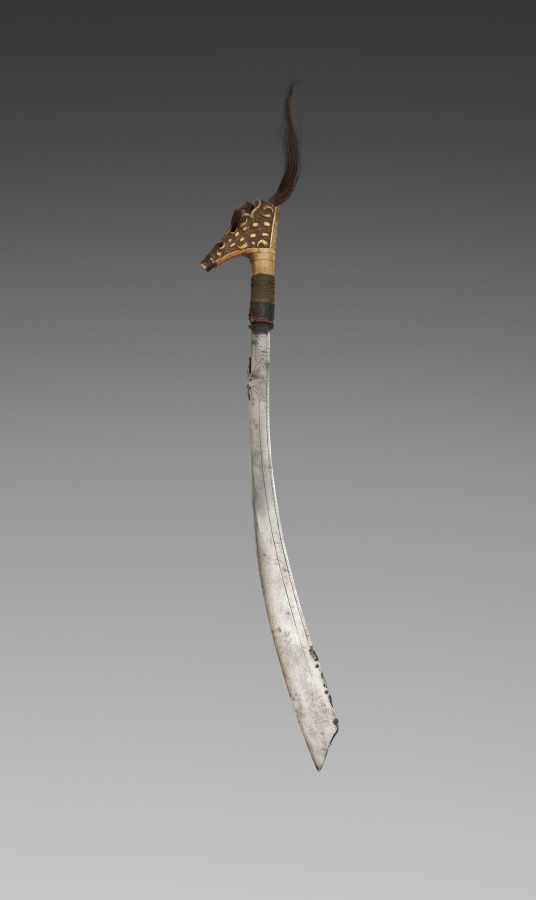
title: Knife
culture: Philippines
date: before 1916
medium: metal, wood, bone, and hair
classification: Arms and Armor